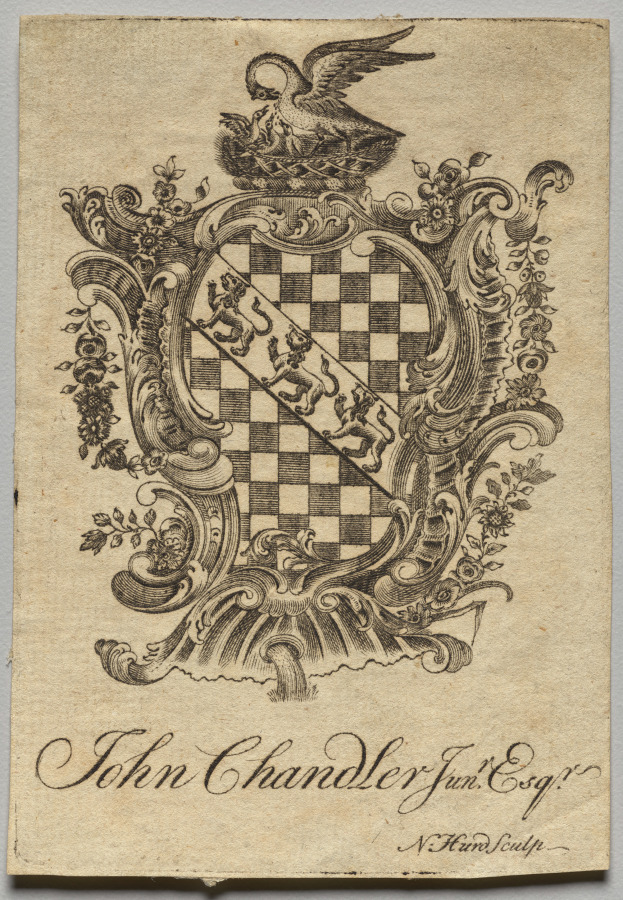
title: Bookplate: Coat of Arms with John Chandler Jun.r, Esq. inscribed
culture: America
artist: Nathaniel Hurd (American, 1730–1778)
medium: engraving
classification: Print